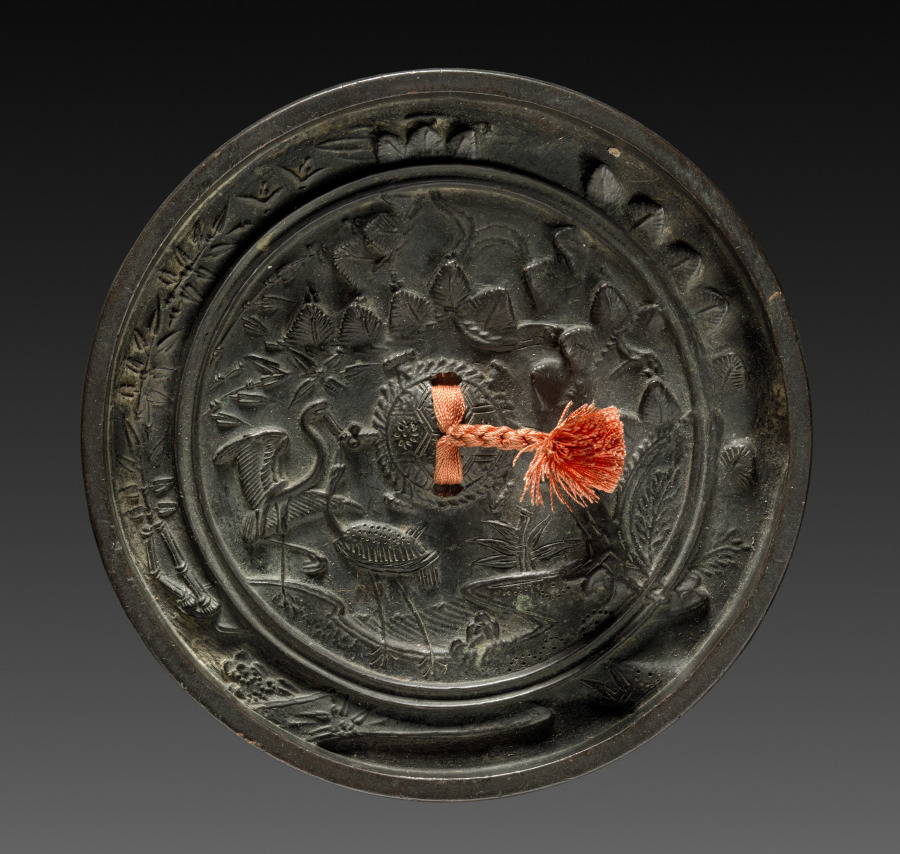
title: Mirror with Pair of Cranes in Landscape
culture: Japan, Muromachi period (1392–1573)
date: 1392–1573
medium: bronze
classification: Metalwork